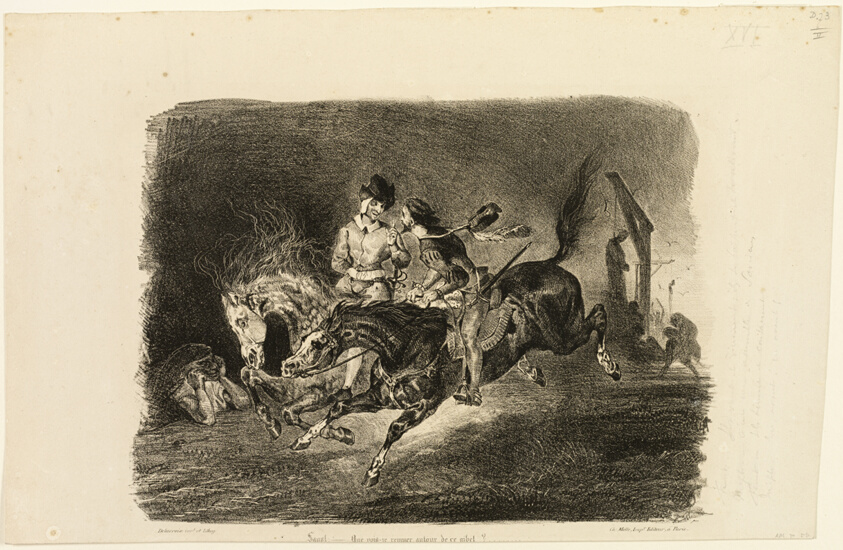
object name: Print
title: Faust and Mephistopheles Galloping Through the Night of the Witches' Sabbath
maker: Eugène Delacroix (French, 1798-1863)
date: 1828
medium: Lithograph in black on ivory wove paper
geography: France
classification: lithograph; print; prints and drawing